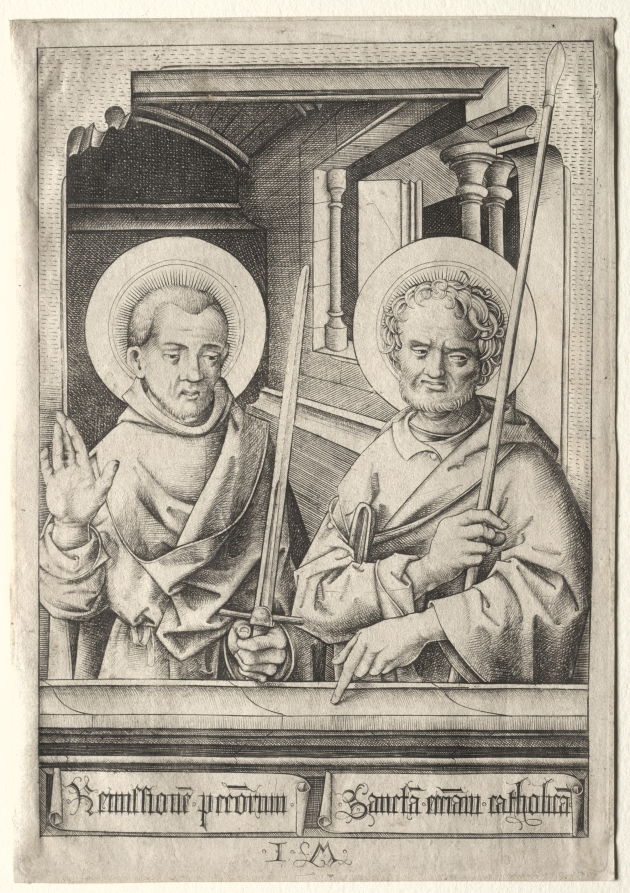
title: The Twelve Apostles: Saint Simon (?) and Saint Matthew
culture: Germany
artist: Israhel van Meckenem (German, c. 1440–1503)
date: c. 1485–95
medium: engraving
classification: Print